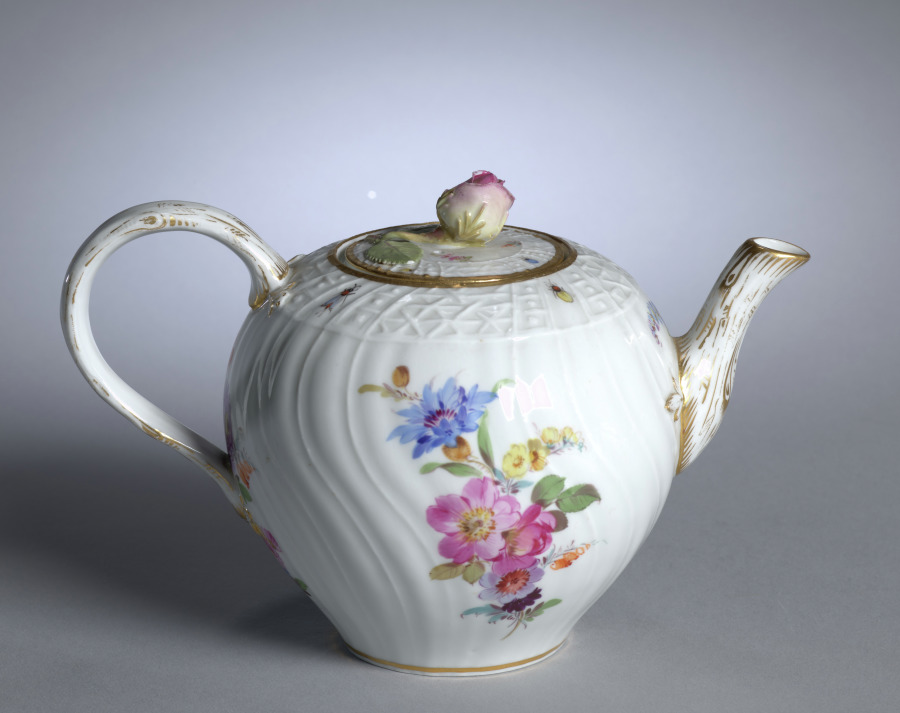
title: Teapot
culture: Germany, Meissen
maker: Meissen Porcelain Factory (German, est. c. 1710)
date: c. 1750–70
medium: porcelain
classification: Ceramic